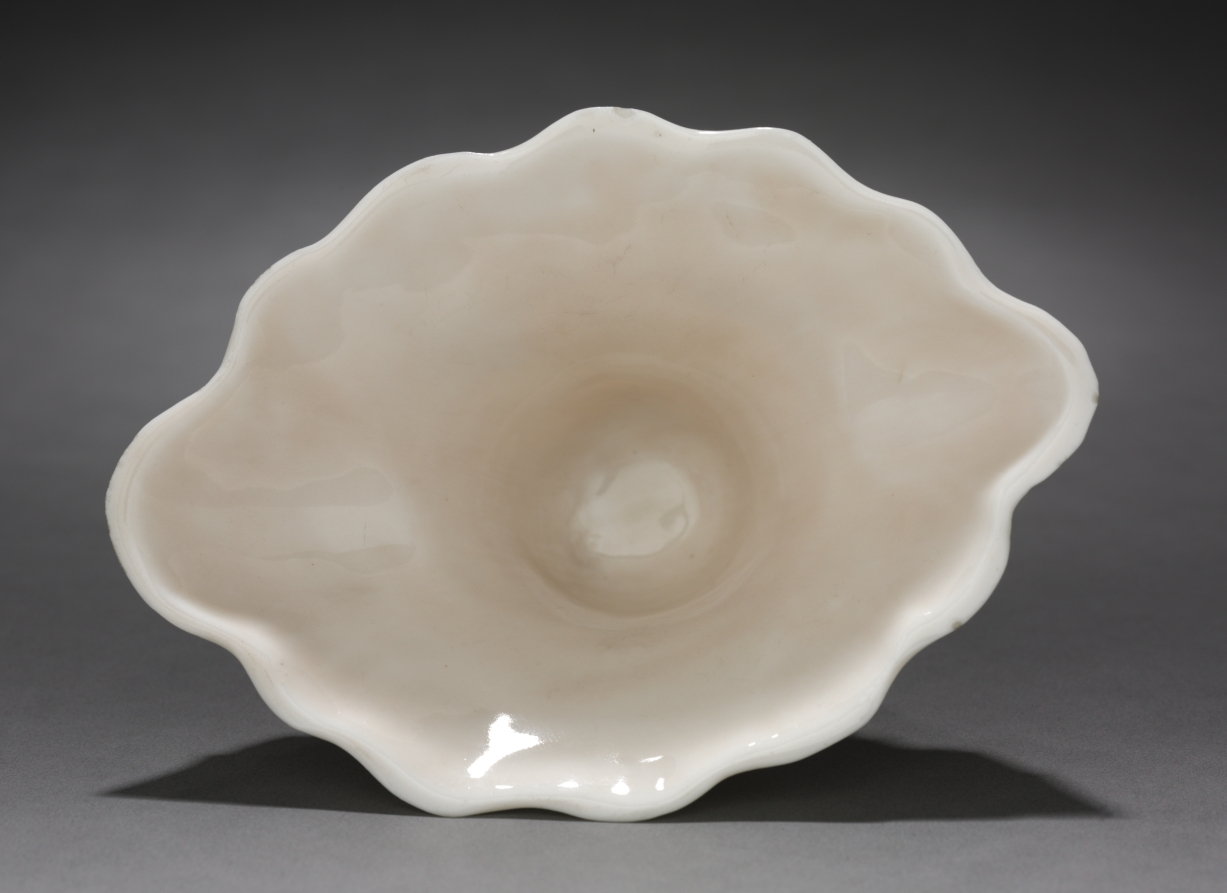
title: Libation Cup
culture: China, Qing dynasty (1644-1911), Kangxi reign (1661-1722)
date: 1662–1722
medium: porcelain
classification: Ceramic